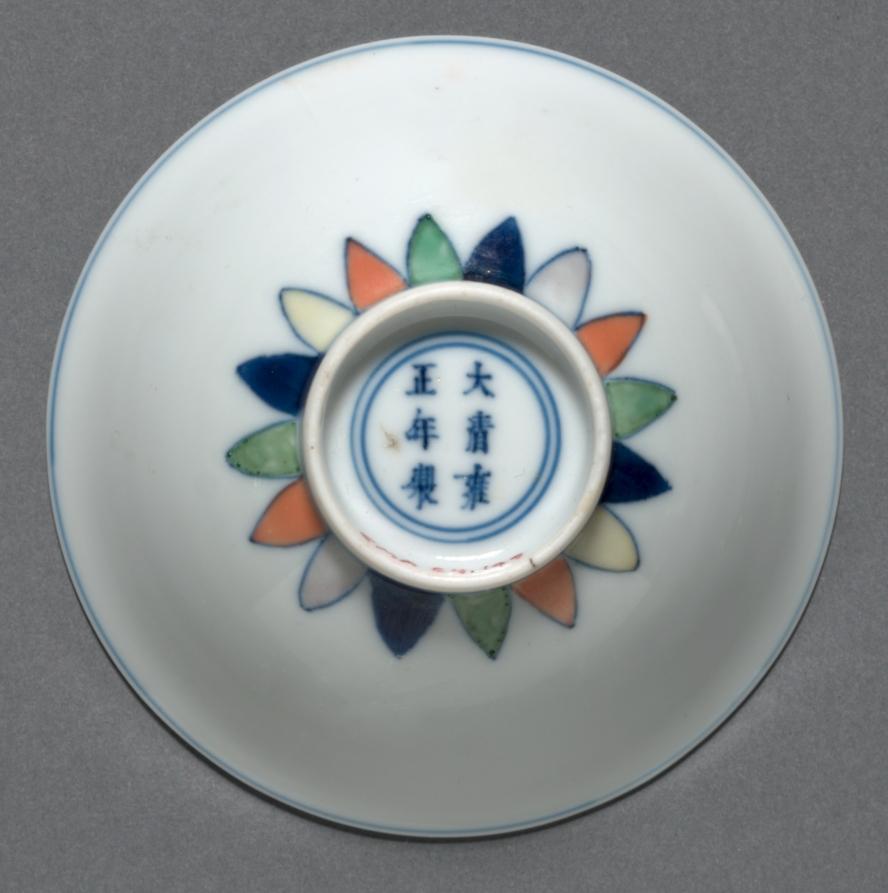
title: Bowl with Flying Cranes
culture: China, Jiangxi province, Jingdezhen kilns, Qing dynasty (1644-1911), Yongzheng mark and reign (1723-35)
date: 1723–35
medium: porcelain decorated in underglaze blue and overglaze enamels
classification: Ceramic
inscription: 大清雍正年制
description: The interior of this small bowl has peaches in the center bordered by stylized cloud forms alternating with cranes in flight. Both cranes and peaches symbolize longevity making this bowl doubly auspicious.